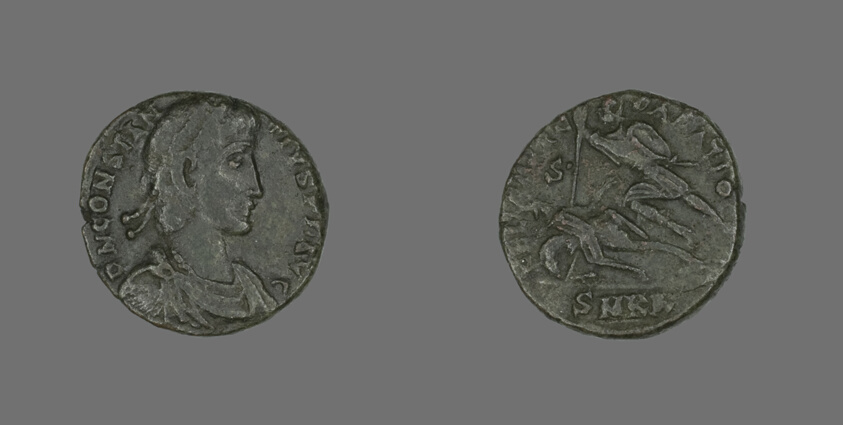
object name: Coin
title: Coin Portraying Emperor Constantius II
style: roman (ancient, style or period), ancient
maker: Roman, minted in Cyzicus (now Turkey)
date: 351-354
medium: Bronze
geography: Roman Empire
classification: coin; ancient art